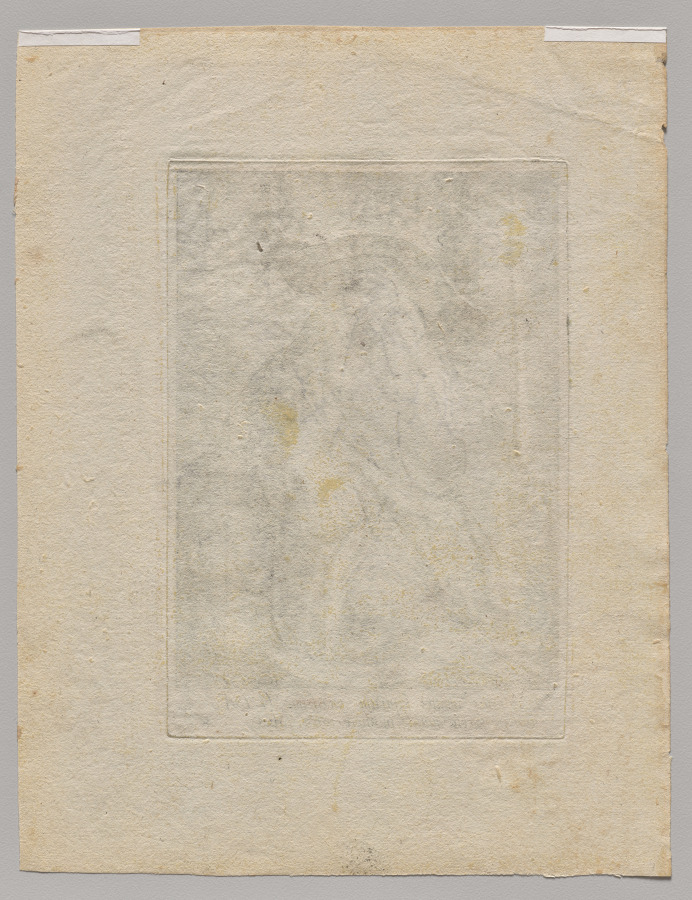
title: Plate 4: Judah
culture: Netherlands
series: The Twelve Sons of Jacob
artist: Jacob de Gheyn II (Netherlandish, 1565–1629)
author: after Karel I van Mander (Netherlandish, 1548–1606)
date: c. 1589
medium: engraving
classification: Print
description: In this print, the biblical figure Judah is posed in a ceremonial robe with a lion and holding a scepter, symbolizing his power, bravery, success in battle, and leadership. This is one of a series of prints depicting the twelve sons of Jacob, each with an attribute and costume that denotes his character. According to the Old Testament, Jacob blessed each of his twelve sons, prophesizing the destiny of their tribe, and assigning them a parcel of land in Canaan. The print series was made in the Netherlands in the late 16th century, a time of political struggle when Old Testament heroes were popular exemplars of fortitude and patience.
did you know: The crown atop the hat of this Old Testament figure symbolizes his status as an ancestor of Kings David and Solomon.